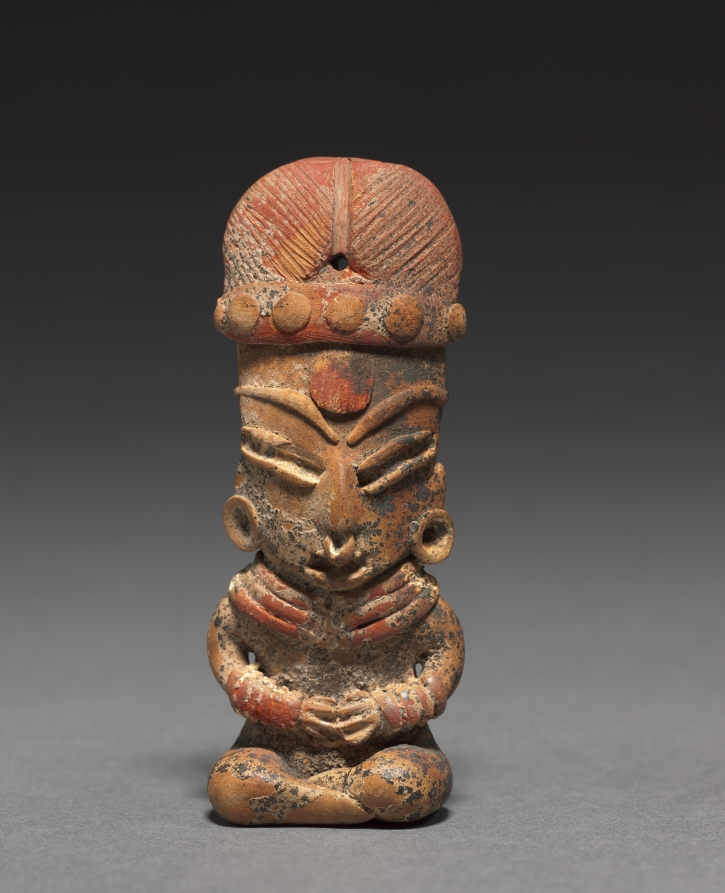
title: Seated Female Figurine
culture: Mesoamerica, Guanajuato or Michoacán, Chupícuaro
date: 600 BCE–250 CE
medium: ceramic, pigments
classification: Ceramic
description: Clay figurines, mainly nude females, were the most common art form of early villages throughout Mesoamerica. The meanings of these sweet, small, intimate works are not known, but they are found both in human burials and in household rubbish, suggesting varied uses.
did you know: Clay figurines, mainly nude females, were the most common art form of early villages throughout Mesoamerica.